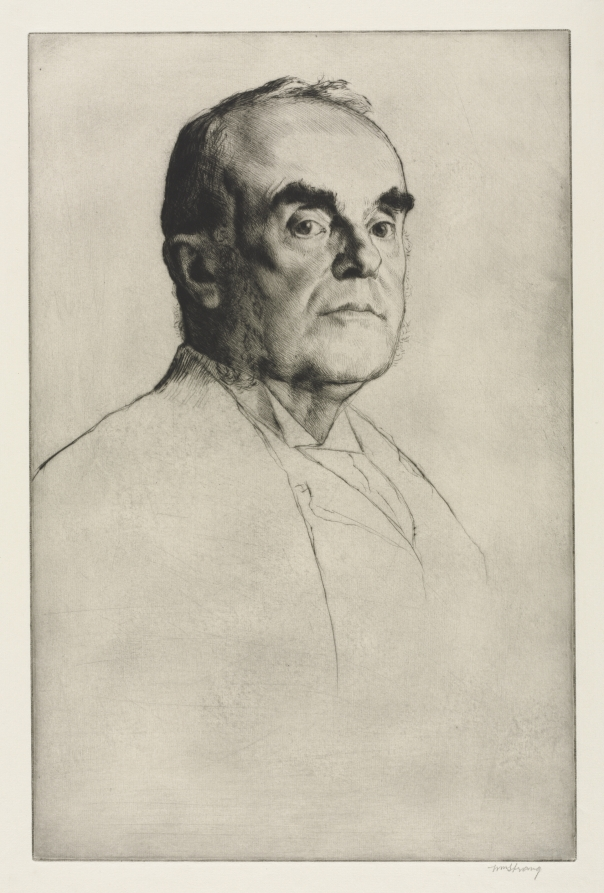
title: James E. Christie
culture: England, 20th century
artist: William Strang (British, 1859–1921)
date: 1911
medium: drypoint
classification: Print